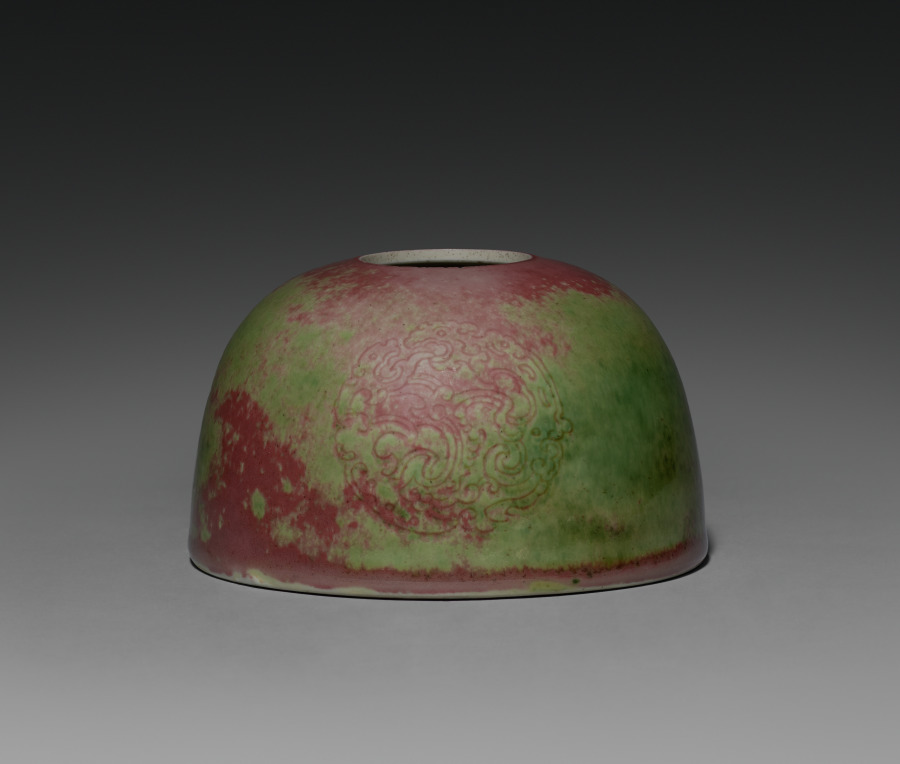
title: Water Pot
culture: China, Jiangxi Province, Jingdezhen, Qing dynasty (1644–1911), Kangxi period (1662–1722)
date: 1662–1722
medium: porcelain with "peach bloom" glaze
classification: Ceramic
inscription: 大清康熙年制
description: The "peach-bloom" glaze developed during the Kangxi era has been described as "drunken with beauty." The water pot's glaze is in shades ranging from red to grayish rose. The interior and base are covered in white glaze.